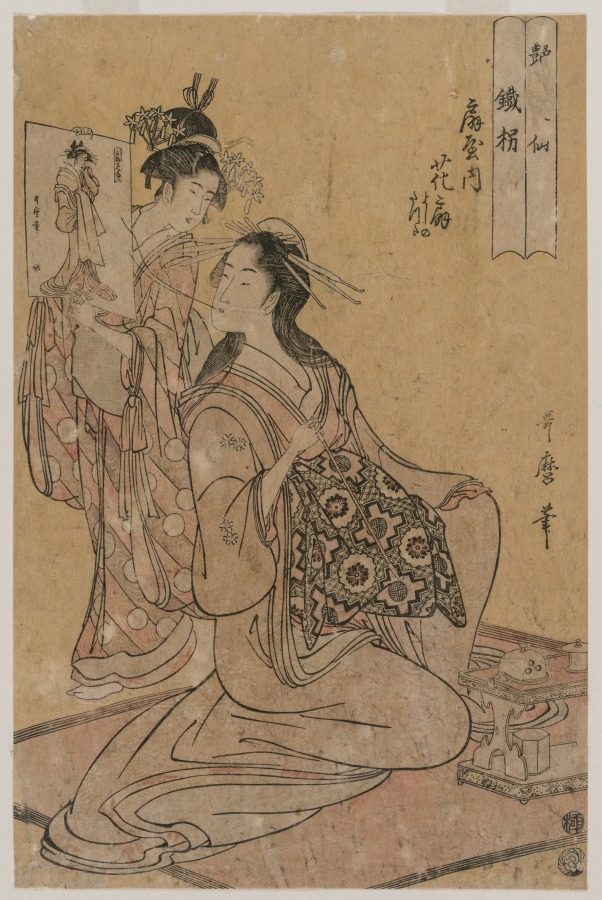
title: The Courtesan Hana-ogi of Ogiya as the Sennin Tekkai (from the series Eight Immortals of Sensuality)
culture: Japan, Edo period (1615–1868)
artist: Kitagawa Utamaro (Japanese, c. 1754–1806)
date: mid 1790s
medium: color woodblock print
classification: Print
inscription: Signature: Utamaro hitsu Publisher: Tsuruya Kiemon (emblem) Censorship Seal: kiwame